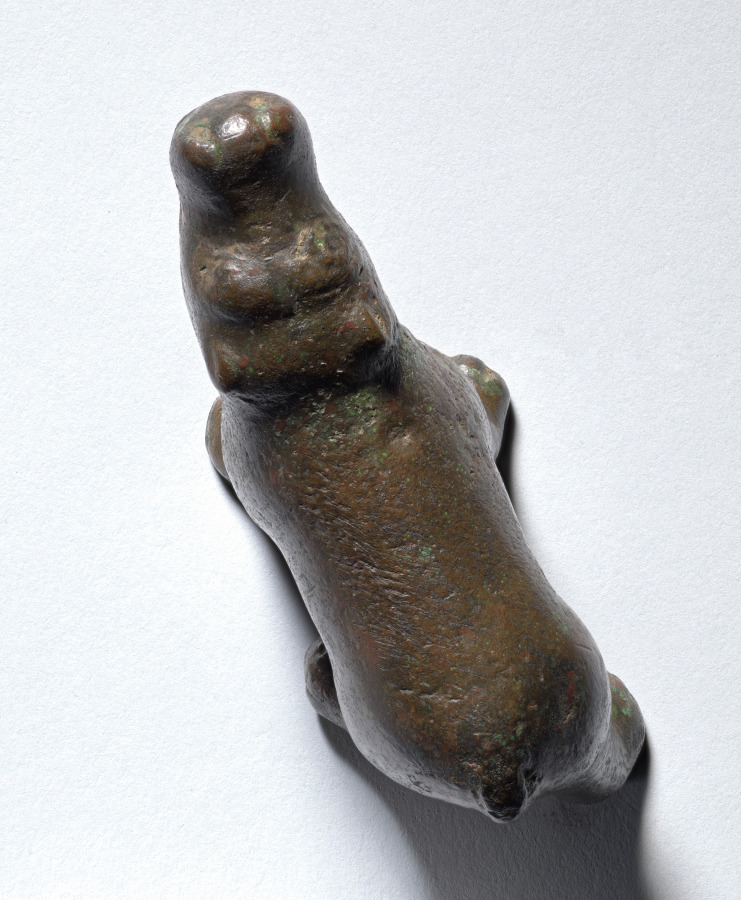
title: Hippopotamus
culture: Italy, Rome, Greco-Roman Period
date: 332 BCE–395 CE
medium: bronze, solid cast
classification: Sculpture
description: This hippopotamus steps forward with its rear left leg lifted off the ground and its head arched upwards. The hippopotamus was a Nilotic animal associated with Egypt and the Nile River that was brought to Rome and put on display in the Colosseum as part of venationes, or wild beast hunts. The rise of “Egyptomania” in the Roman Empire surged under the emperor Hadrian (reigned AD 117–38). Extant Egyptian examples of hippopotamus figurines are less animated and made of materials such as stone or pottery rather than bronze, making the pose and materiality of this object distinctly Greco-Roman.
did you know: The word hippopotamus is a Greek compound word combining “horse” (hippos) and “river” (potamos).